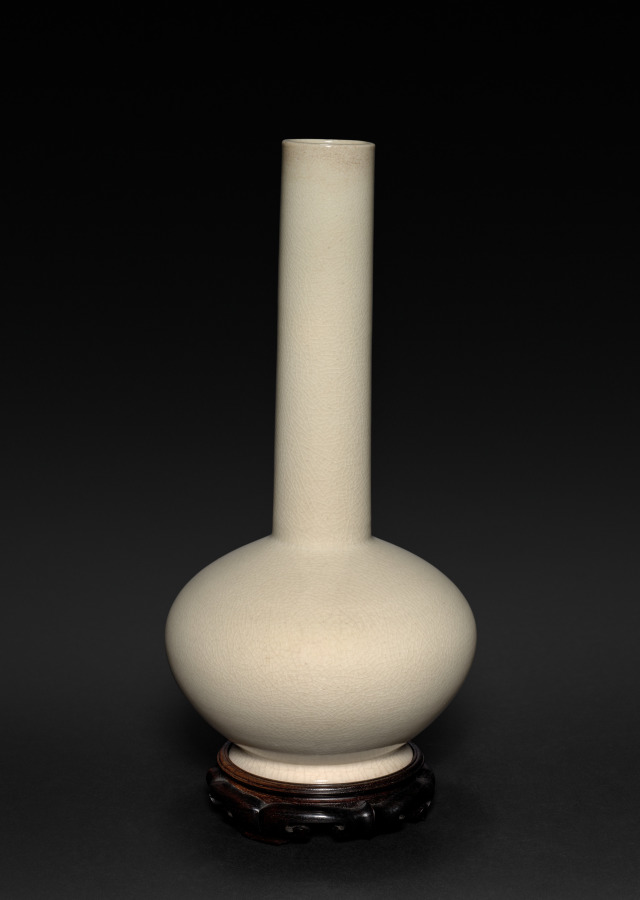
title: Long-Necked Vase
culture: Japan, Meiji period (1868–1912)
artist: Seifū Yohei III (Japanese, 1851–1914)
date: 1893–97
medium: Stoneware with crackled glaze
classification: Ceramic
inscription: 大日本清風造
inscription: 帝室技芸員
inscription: 清風盧人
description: The glazing of this long, narrow-necked and bulbous-based vase has a network of shallow cracks, created when the glaze fractured as it cooled from firing. It is called a cracked-ice pattern or glaze, since the effect resembles the surface of a frozen lake. The cracks here are of a consistently high density throughout the vessel. This pattern is observed also in the transparent glaze of some Kyoto ware, in some of Yohei III’s green glazes, and in some of his vessels emulating Chinese forms. The interior of the box lid has an attestation to its authenticity by Yohei IV, and the footring is inscribed Seifū of Great Japan (Dai Nihon Seifū) in iron black.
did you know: Seifū Yohei III apprenticed in the Seifū studio, married into the family, and later adopted the Seifū Yohei name, when he became head of the studio.